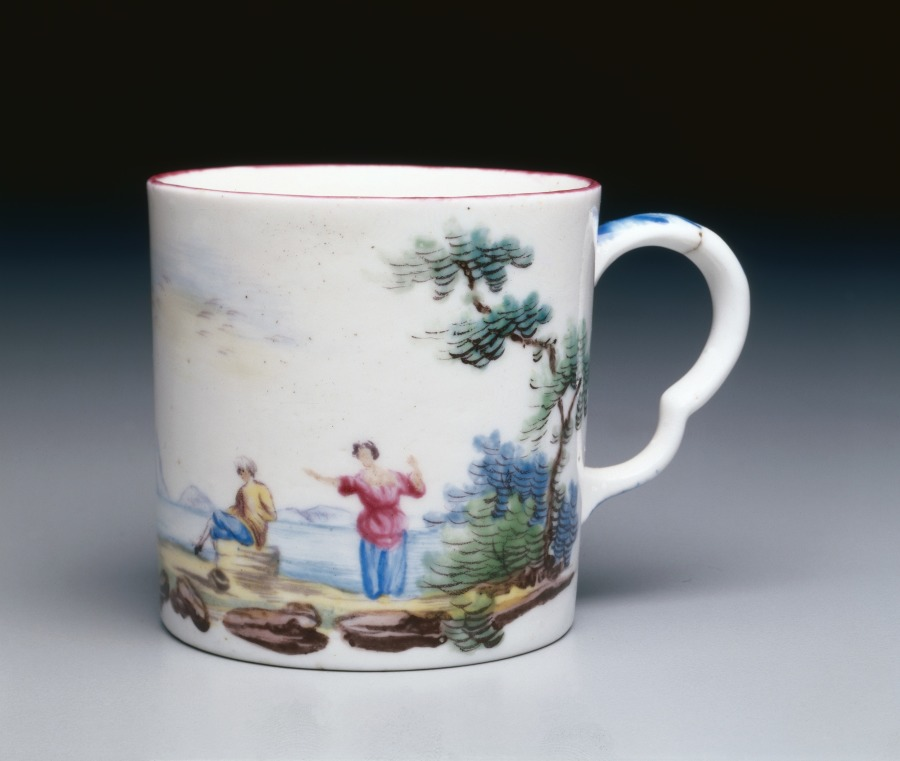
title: Cup and Saucer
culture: France, 18th century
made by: Sceaux Factory (French, active 1748–66)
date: c. 1775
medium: soft-paste porcelain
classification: Ceramic